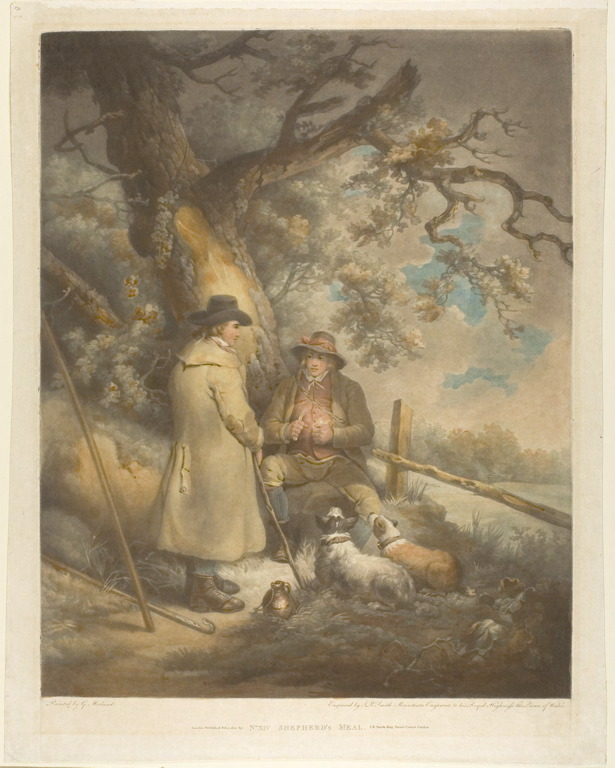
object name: Print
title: Shepherd's Meal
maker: John Raphael Smith (English, 1751-1812); after George Morland (English, 1763-1804)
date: published February 1, 1803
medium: Hand-colored Mezzotint on ivory wove paper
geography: England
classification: mezzotint; print; prints and drawing